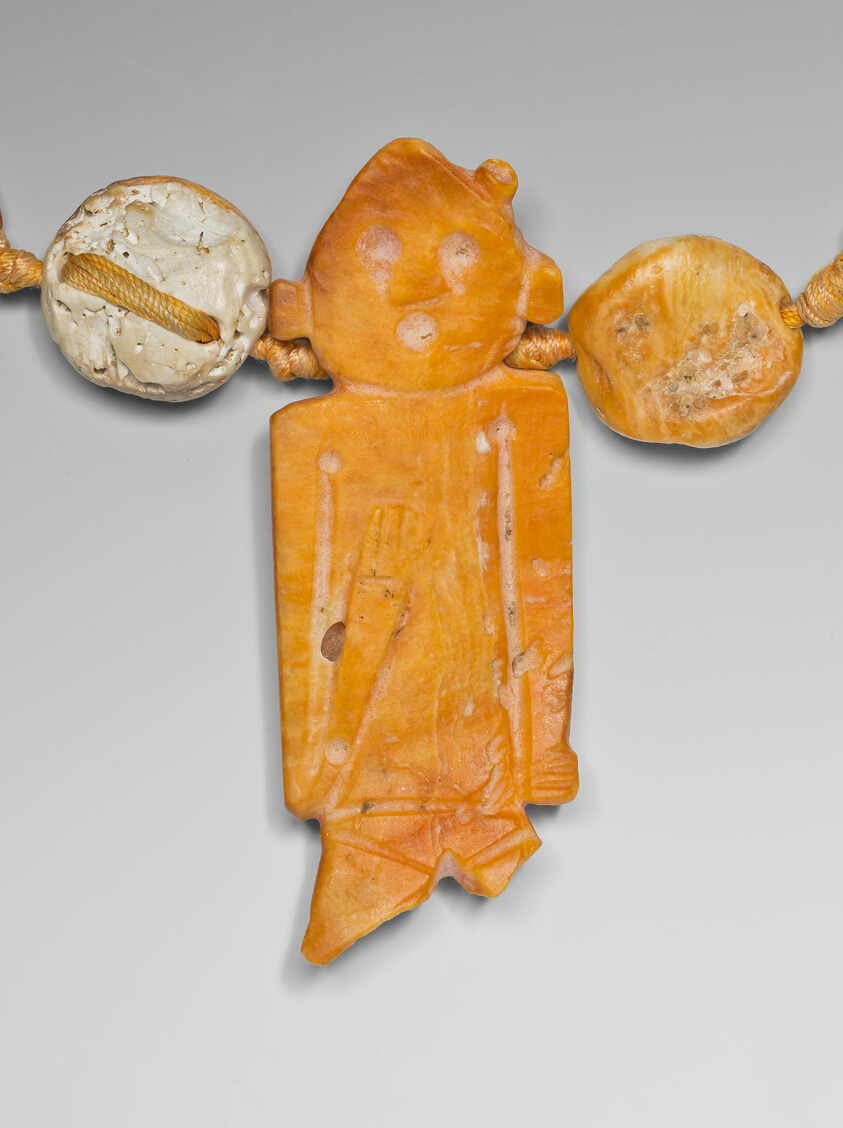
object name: Costume and Accessories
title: Necklace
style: colima, mesoamerican, Pre-Columbian, americas, jalisco, west mexico, Arts of the Americas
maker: Colima or Jalisco; Colima or Jalisco, Mexico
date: 200 BCE–200 CE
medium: Spondylus shell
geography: Western Mexico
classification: shell; art of the americas; jewelry; costume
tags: jewelry, shells, figures (representations), water